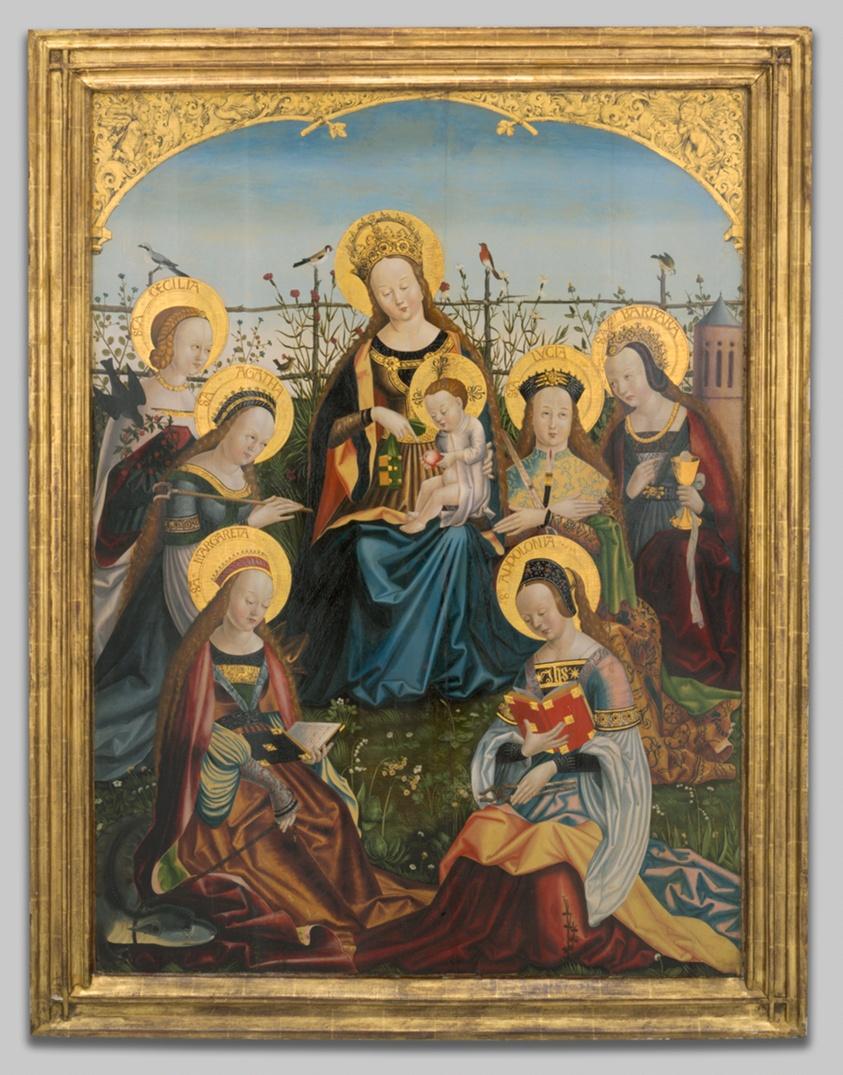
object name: Painting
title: Triptych of the Virgin and Child with Saints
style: 16th Century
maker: South German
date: c. 1510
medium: Oil and tempera on panel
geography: Germany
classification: triptych; painting; oil on panel; paint; tempera; european painting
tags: Century of Progress, woman with children, woman, women, Saint Margaret, Christian subjects, Christianity, garden, saints, Virgin and child/Madonna and child, Virgin Mary, world's fairs, Chicago World's Fairs